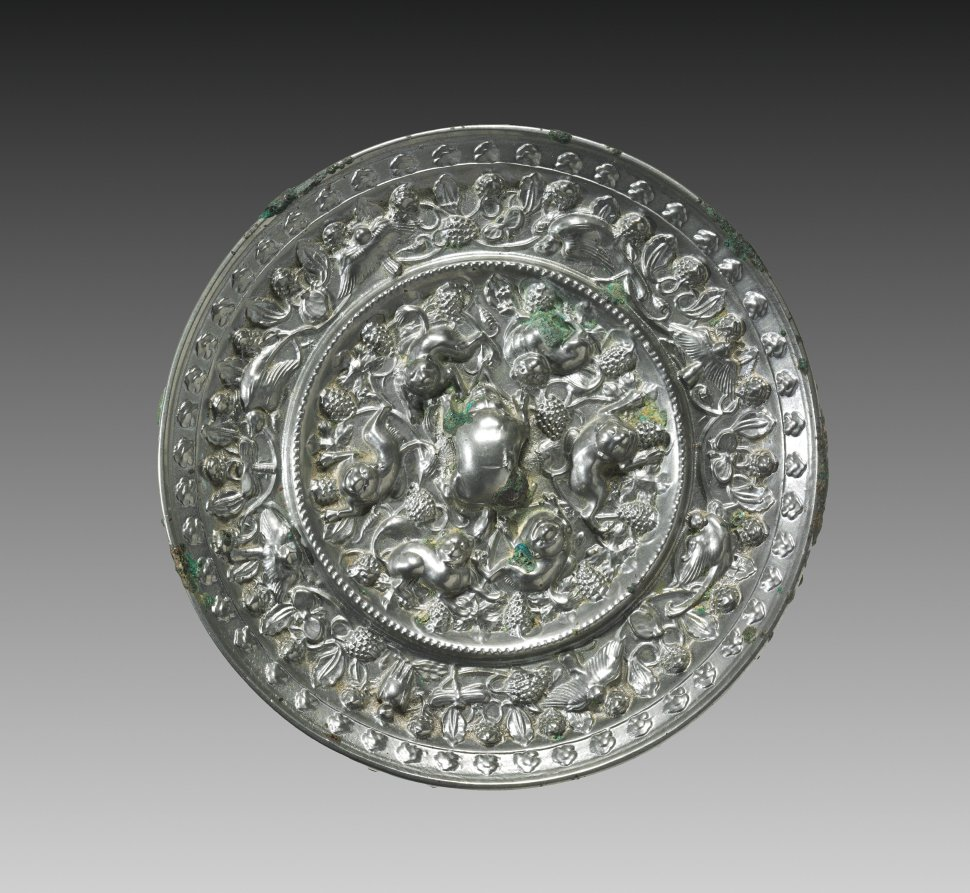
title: Animal-and-Grape Mirror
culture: China, Tang dynasty (618-907)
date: late 600s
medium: bronze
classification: Metalwork